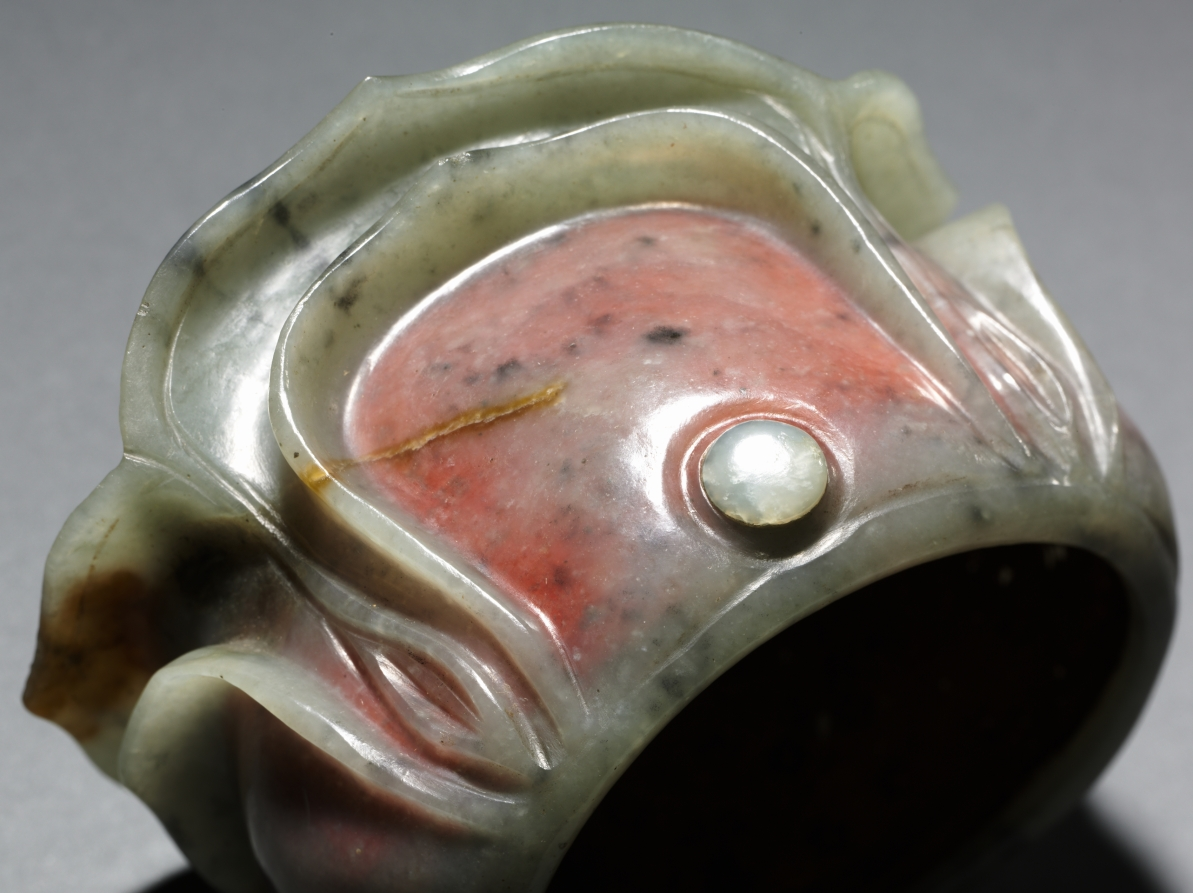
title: Daoist Cap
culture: China, Song dynasty (960-1279) - Yuan dynasty (1271-1368)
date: 960–1279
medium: grayish-green jade with brown and black markings; interior with pink pigment and gold inlays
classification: Jade